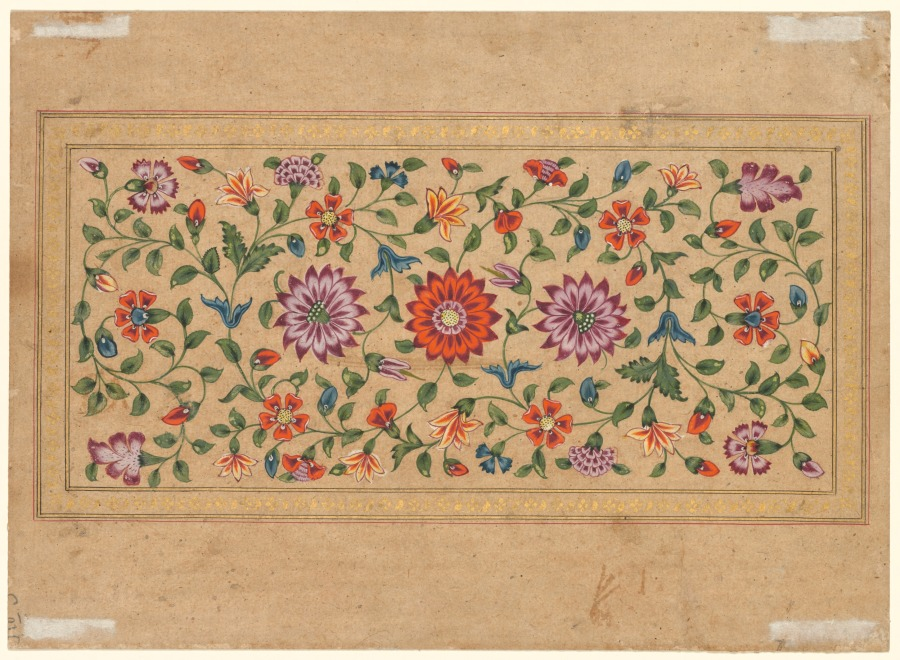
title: Scrolling Floral Vines (verso)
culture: India, Lucknow, Mughal, 18th century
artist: Fayzullah (Indian, active c. 1730–1765)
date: 1755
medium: Gum tempera and gold on paper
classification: Calligraphy